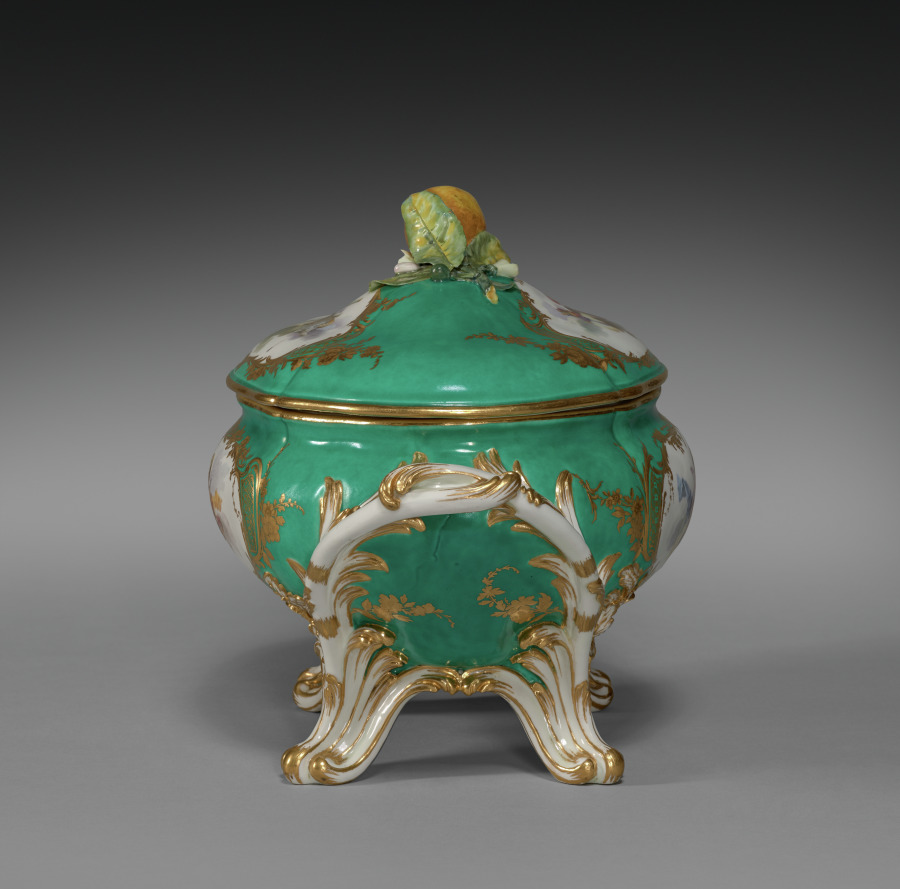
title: Covered Tureen (Terrine du roi)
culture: France, Sèvres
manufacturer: Sèvres Porcelain Factory (French, est. 1756)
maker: attributed to Charles Nicolas Dodin (French, 1734–1803)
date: 1756–57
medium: soft-paste porcelain with enamel and gilt decoration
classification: Ceramic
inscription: [Interlaced L's]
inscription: [Date letter 'D' (in cursive with a dot on either side)]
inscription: [Incised 'b']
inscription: [Incised '6']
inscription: [Inventory numbers in red enamel]: "r.u./710" [base of tureen]; "r.u./710a" [on lid]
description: This tureen’s striking green background, or fond vert, was a major advancement for the Sèvres Porcelain Factory, known for their innovation in and mastery of color. Traditionally the largest, most expensive item in an 18th-century French dinner service, this tureen was part of a porcelain dining set presented to King Frederick V of Denmark by French King Louis XV in 1758.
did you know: French King Louis XV was a great patron of the decorative arts; he acquired the Sèvres Porcelain Factory in 1759.